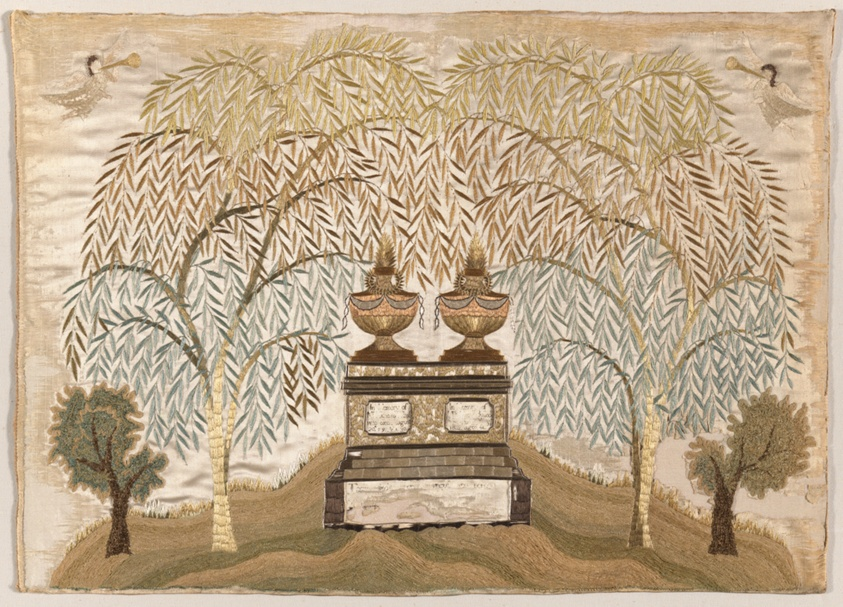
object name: Textile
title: Mourning Sampler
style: americas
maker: Mary Balch's School (Providence, Rhode Island, United States)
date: c. 1810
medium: Silk, warp-float faced 4:1 satin weave; embroidered with silk and silk chenille in split, surface satin, and stem stitches; couching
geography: Rhode Island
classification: textile; needlework (visual works); embroidery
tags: Mourning, Burial, death